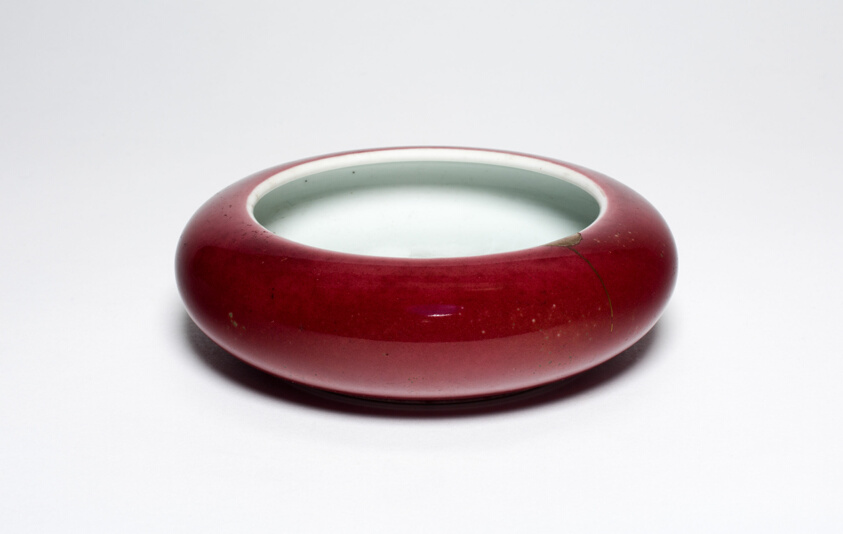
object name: Vessel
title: Brush Washer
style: Chinese (culture or style)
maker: China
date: Qing dynasty (1644–1911), Kangxi reign mark and period (1662–1722)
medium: Porcelain with copper red peachbloom glaze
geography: China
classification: writing equipment; household accessory; container; porcelain; asian art; ceramics; vessel